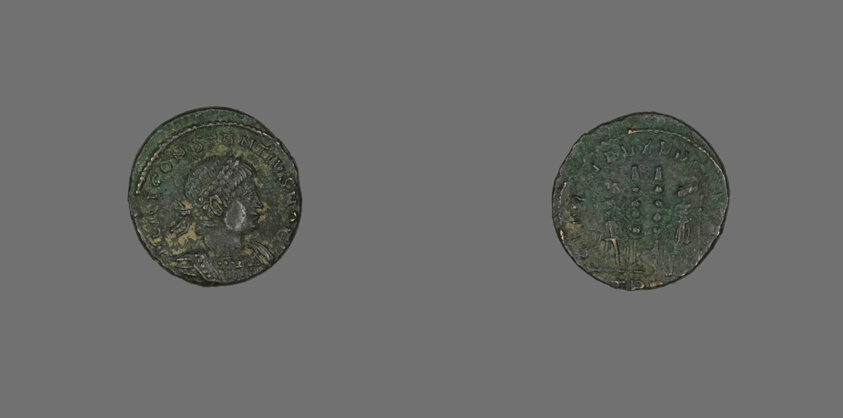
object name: Coin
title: Coin Portraying Emperor Constantine II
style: roman (ancient, style or period), ancient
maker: Roman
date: 324-337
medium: Bronze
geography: Roman Empire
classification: coin; ancient art